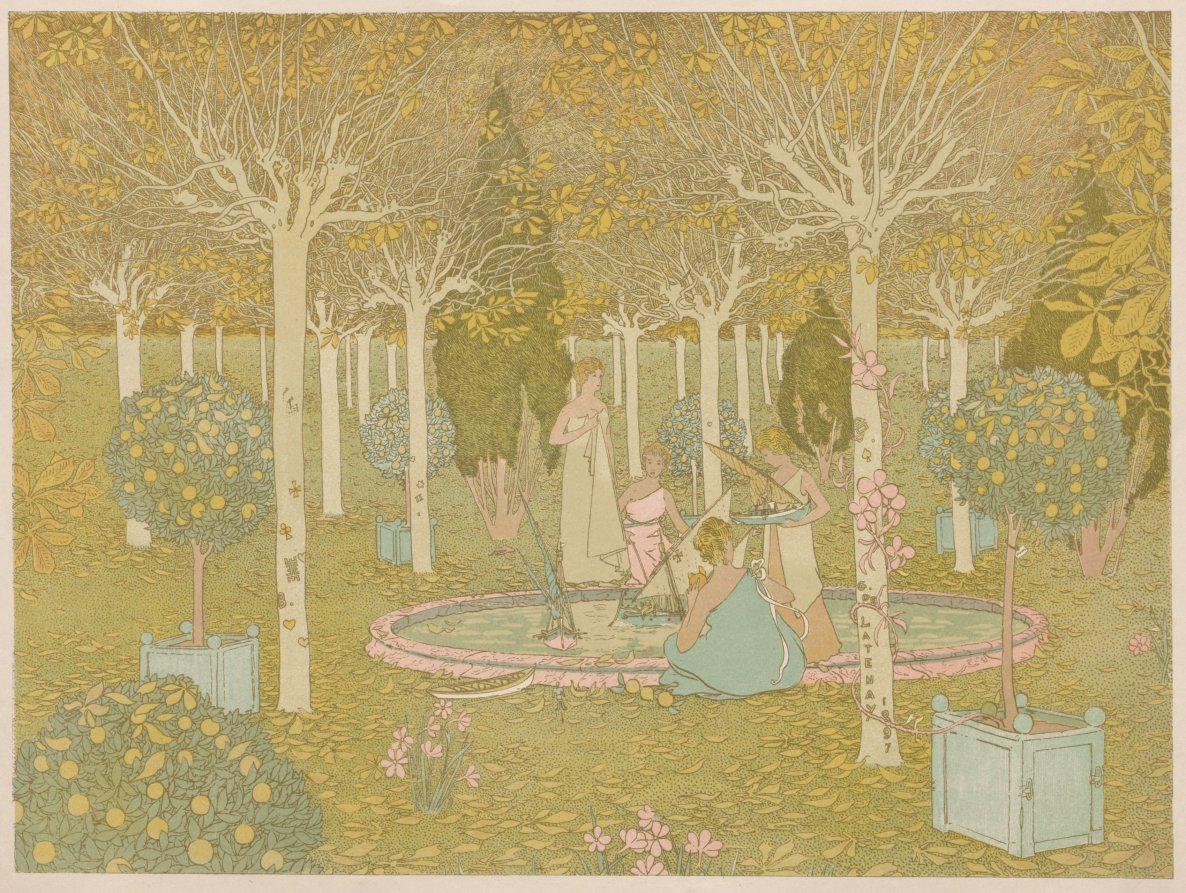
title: The Park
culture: France, 19th century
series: published in L'Estampe Moderne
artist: Gaston de Latenay (French, 1859–1943)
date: 1897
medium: color lithograph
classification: Print